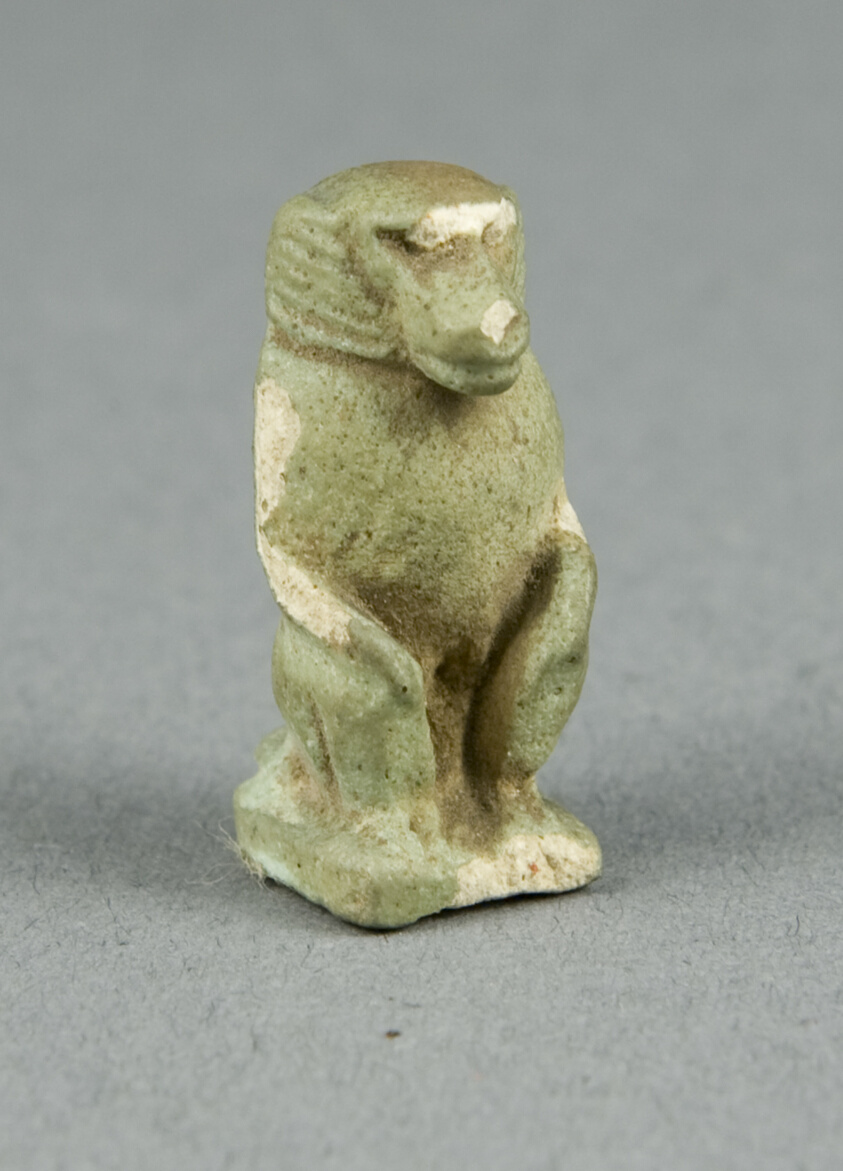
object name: Costume and Accessories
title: Amulet of the God Thoth as a Seated Baboon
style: late period (egyptian), ancient, egyptian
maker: Egyptian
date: Late Period, Dynasties 26–31 (664–332 BCE)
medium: Faience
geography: Egypt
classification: amulet; jewelry; ceramics; ancient art; costume; faïence (composite material)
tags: gods (deities), deities, baboon